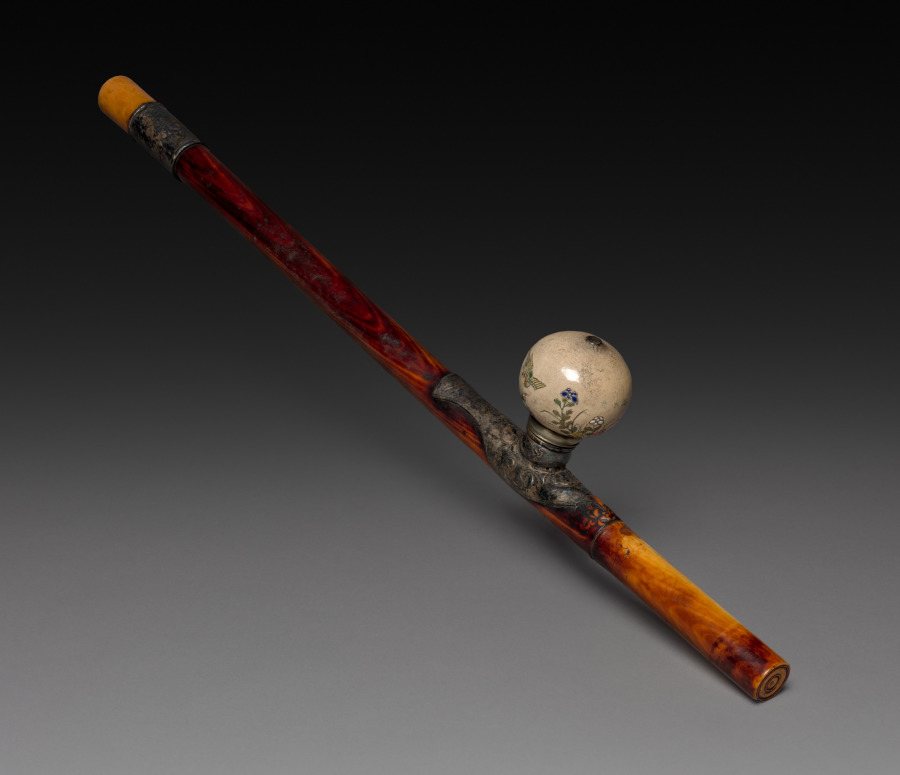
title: Opium Pipe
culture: China, Qing dynasty (1644-1911)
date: 1800s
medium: ivory stem decorated with silver and enamel work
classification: Miscellaneous